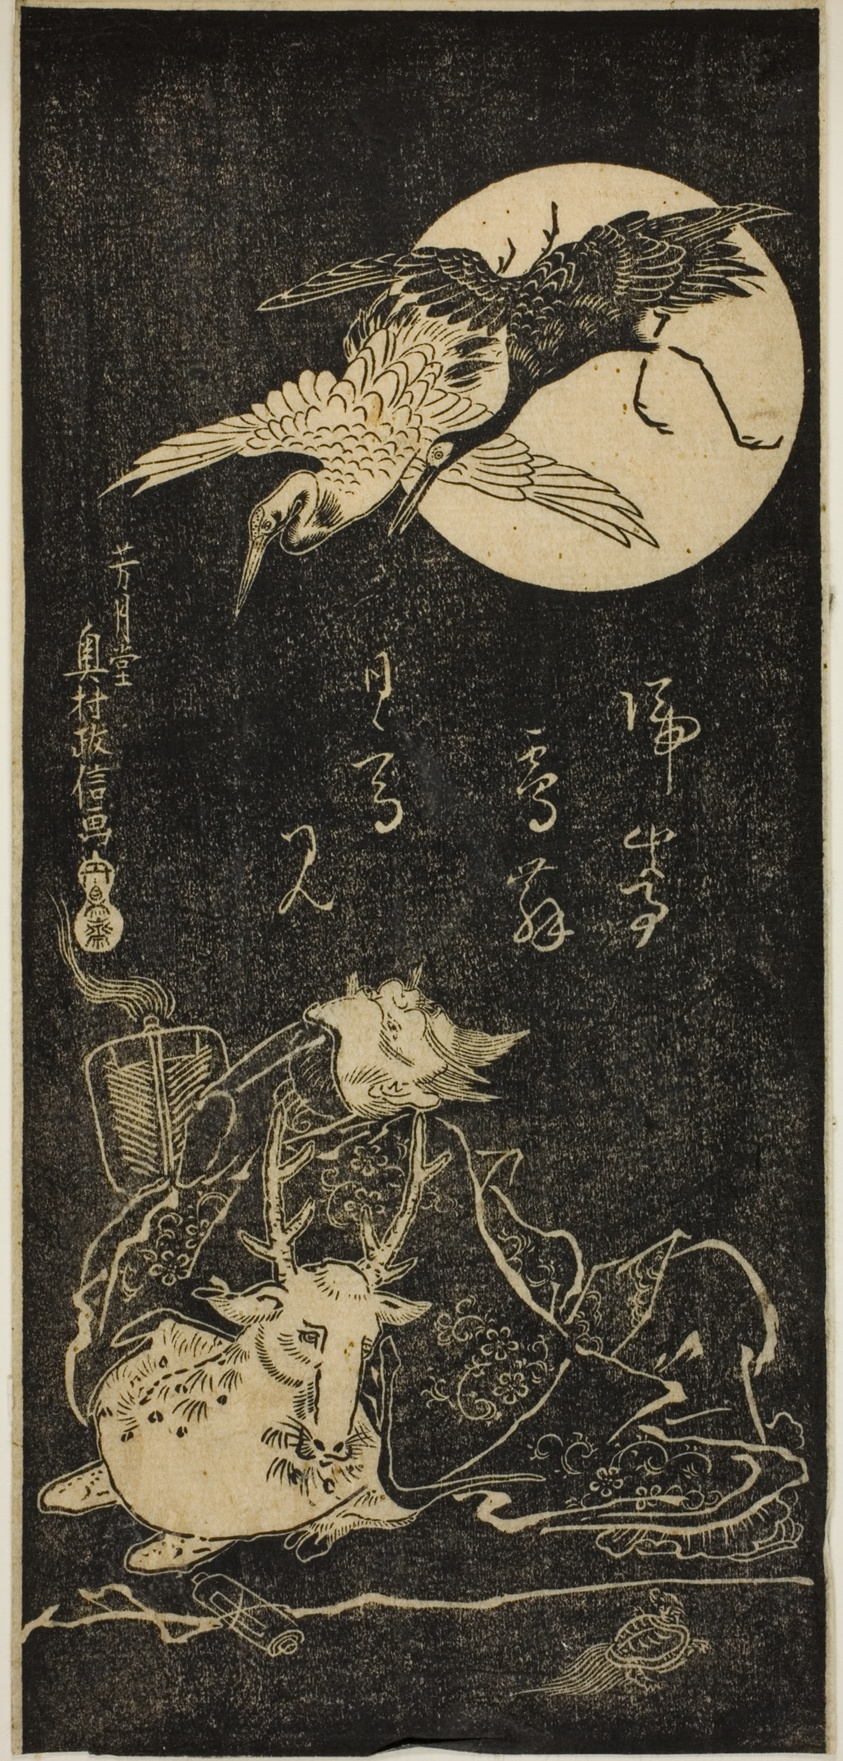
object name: Print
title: Jurojin with cranes, a stag, and a tortoise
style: Japanese (culture or style)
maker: Okumura Masanobu (Japanese, 1686-1764)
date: 18th century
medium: Woodblock print; hosoban, sumizuri-e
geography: Japan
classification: woodblock print; print; asian art; woodblock